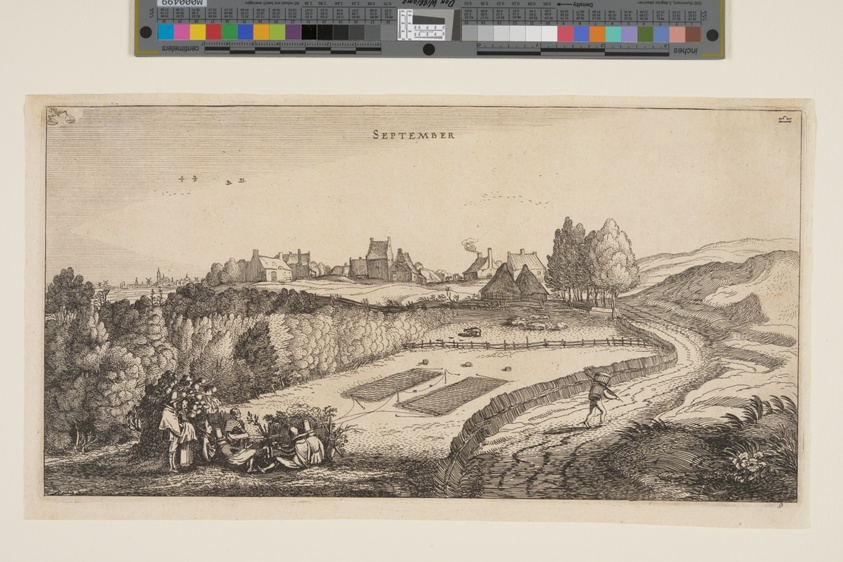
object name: Print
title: September, from The Twelve Months of the Year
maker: Jan van de Velde II (Dutch, c. 1593–1641); after Willem Buytewech (Dutch, c. 1591–1624)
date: 1616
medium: Etching on ivory laid paper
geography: Netherlands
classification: etching; paper; print; prints and drawing